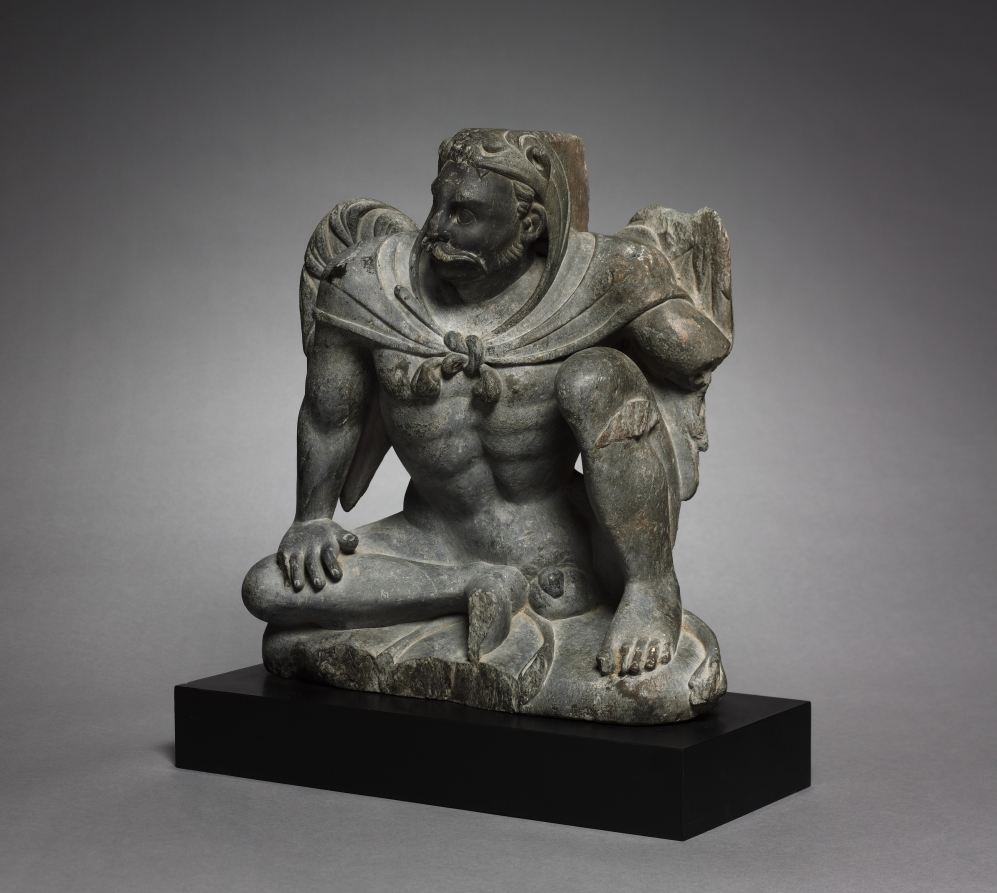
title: Winged Atlas-Hercules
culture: Pakistan, Gandhara, Gandhara period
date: 200s CE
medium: schist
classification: Sculpture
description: In Buddhist art of the Gandharan region during the time of heightened contact with the Mediterranean world, the figure of Atlas was adopted, but given wings so as to appear superhuman. This figure has been conflated with the image of Hercules, who wears the skin of the Nemean lion, and relieved Atlas of his duties for a short time. Repeated images of composite Atlas-like figures surrounded the base of the monuments called stupas, which were solid domes, and can be understood as symbols for the sky, which would have appeared as though supported by rows of titanic figures. Other examples of this figure hold a thunderbolt (vajra) in one hand, suggesting that he could also allude to Vajrapani, an early protector divinity of the Buddha. Images of Vajrapani can combine attributes of Hercules, Zeus, and Hermes.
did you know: This figure combines the attributes of Atlas, Hercules, and Vajrapani.